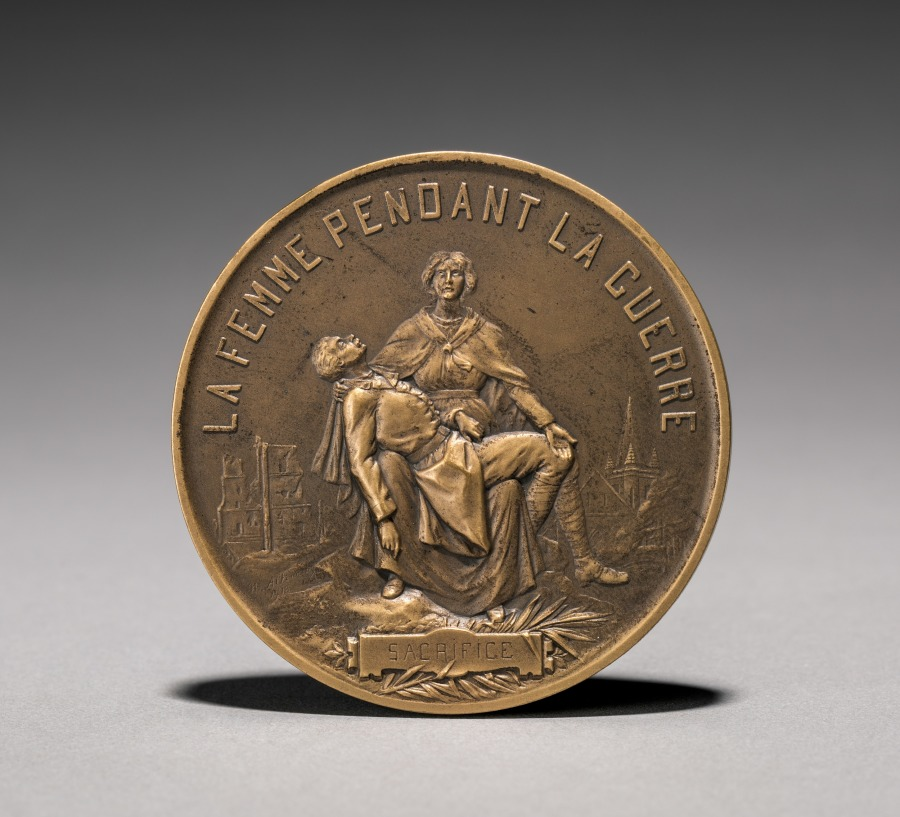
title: Medallion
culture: France, 19th-20th century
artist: Henri Emile Allouard (French, 1844–1929)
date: 1918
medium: bronze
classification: Metalwork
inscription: "Sacrifice. La femme pendant la Guerre" (woman during the war); signed: "H. Allouard 1918."